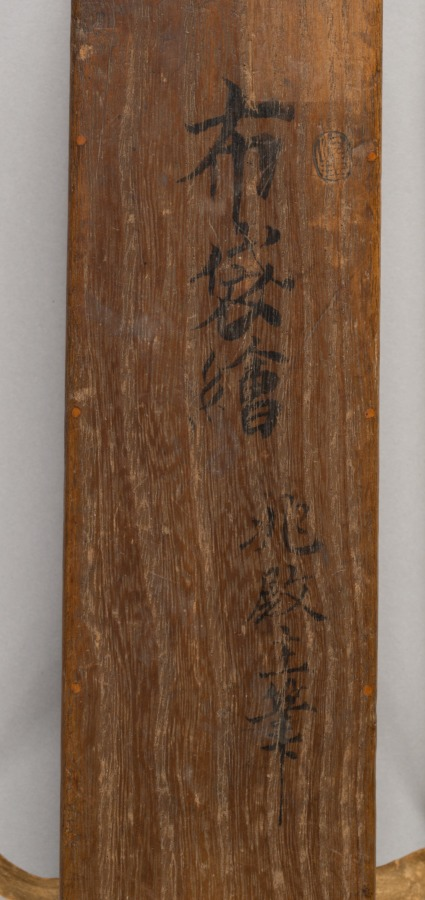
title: Hotei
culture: Japan, Muromachi period (1392–1573)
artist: Kichizan Minchō (Japanese, 1352–1431)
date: late 1300s–early 1400s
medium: hanging scroll; ink and slight color on paper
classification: Painting